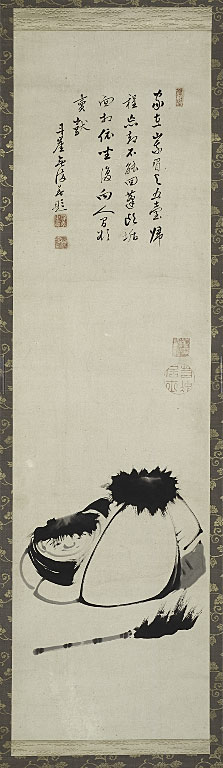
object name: Painting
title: Kanzan and Jittoku.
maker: Ito Jakuchu,; Japanese, 1716-1800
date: 18th century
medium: Hanging scroll; ink on paper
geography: Japan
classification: hanging scroll; painting; asian art